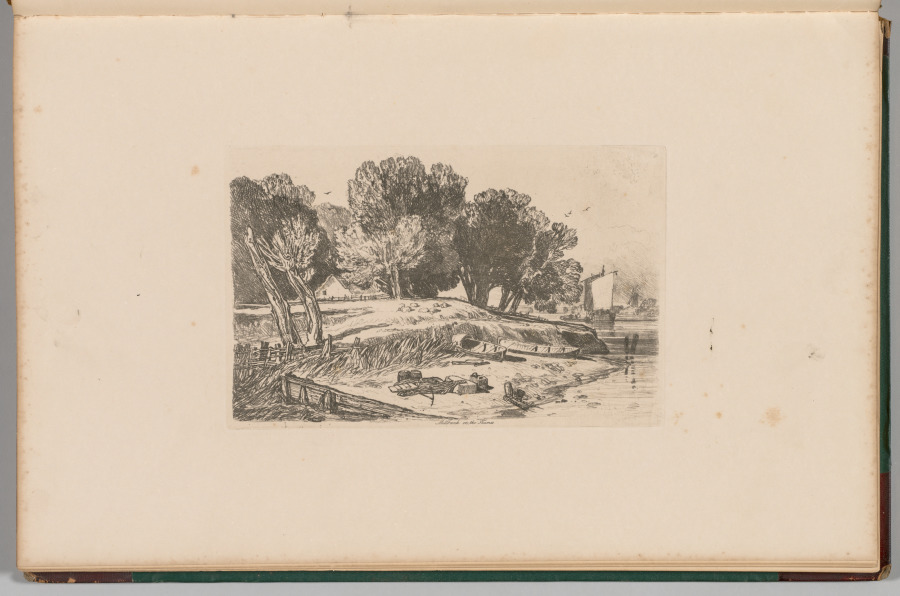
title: Liber Studiorum: Plate 8, Millbank on the Thames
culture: England, 19th century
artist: John Sell Cotman (British, 1782–1842)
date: 1838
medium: softground etching, from a bound volume containing 48 plates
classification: Bound Volume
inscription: In plate, within image, upper right: 8; in plate, below image: Millbank on the Thames